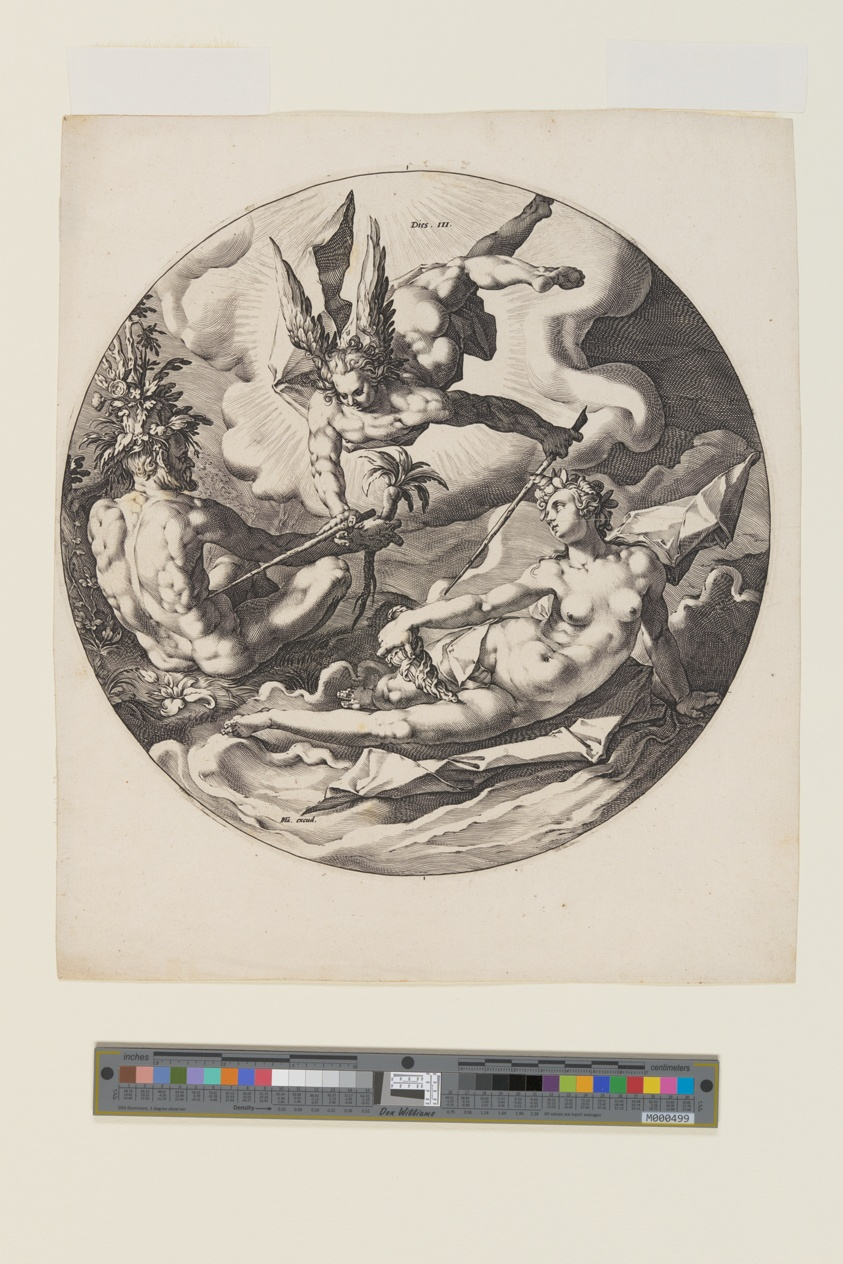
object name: Print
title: The Third Day, plate 4, from Creation of the World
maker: Jan Harmensz Muller (Dutch, 1571–1628); after Hendrick Goltzius (Dutch, 1558–1617)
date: 1590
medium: Engraving on ivory laid paper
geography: Netherlands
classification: print; paper; prints and drawing; engraving